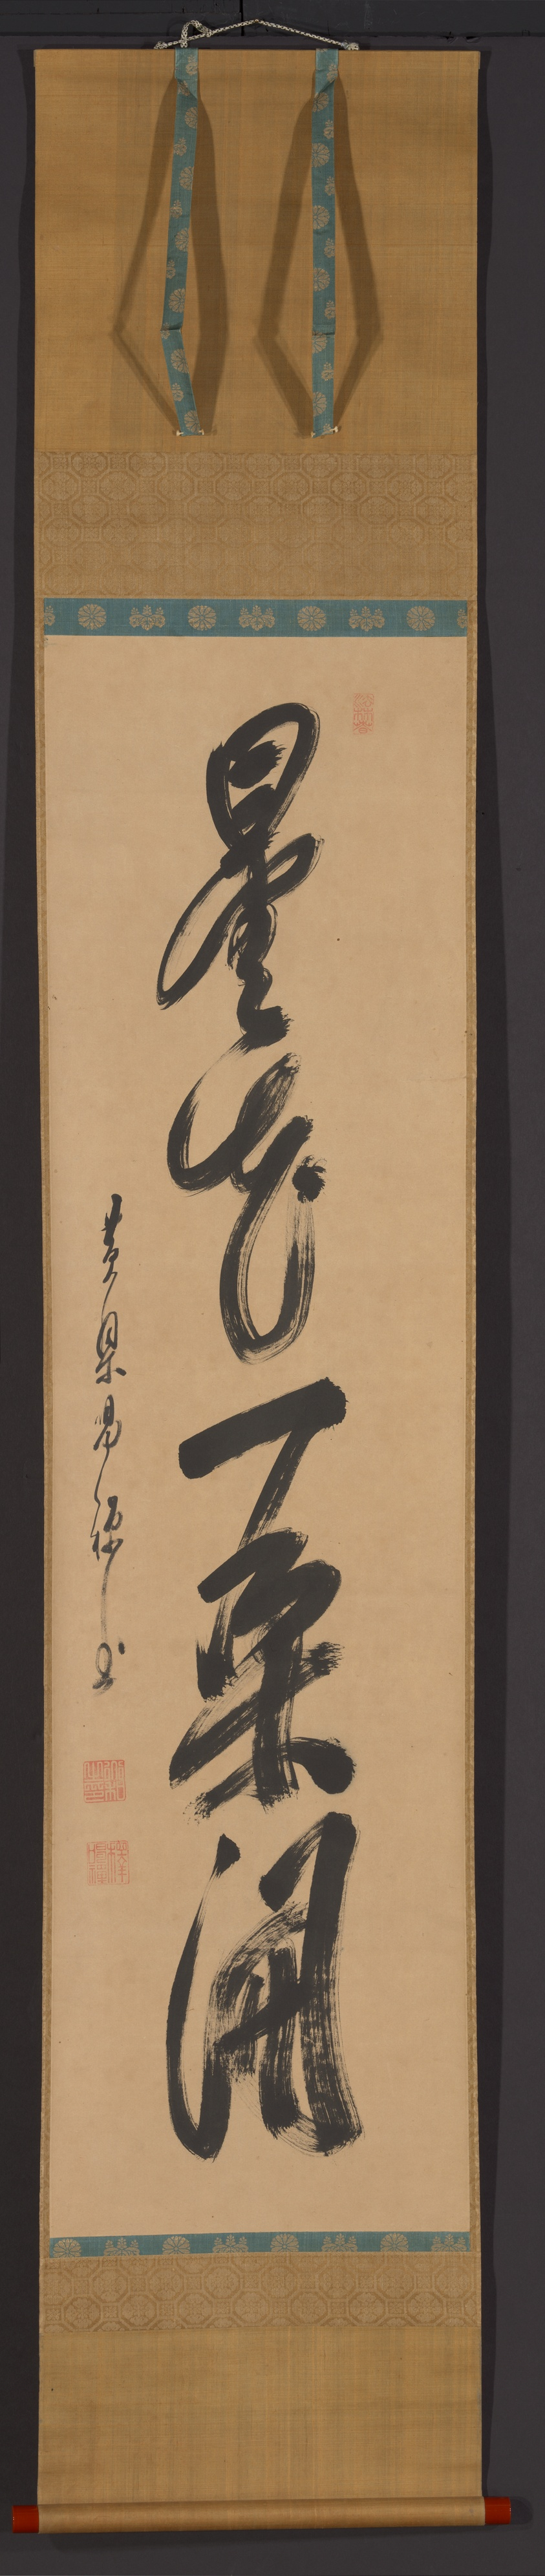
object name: Painting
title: Triptych of Calligraphy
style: edo (japanese period), Japanism, East Asian, asian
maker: Katsuzen Dowa; Japanese, 1634-1707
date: Late 17th–early 18th century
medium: Set of three hanging scrolls; ink on paper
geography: Japan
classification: hanging scroll; painting; asian art